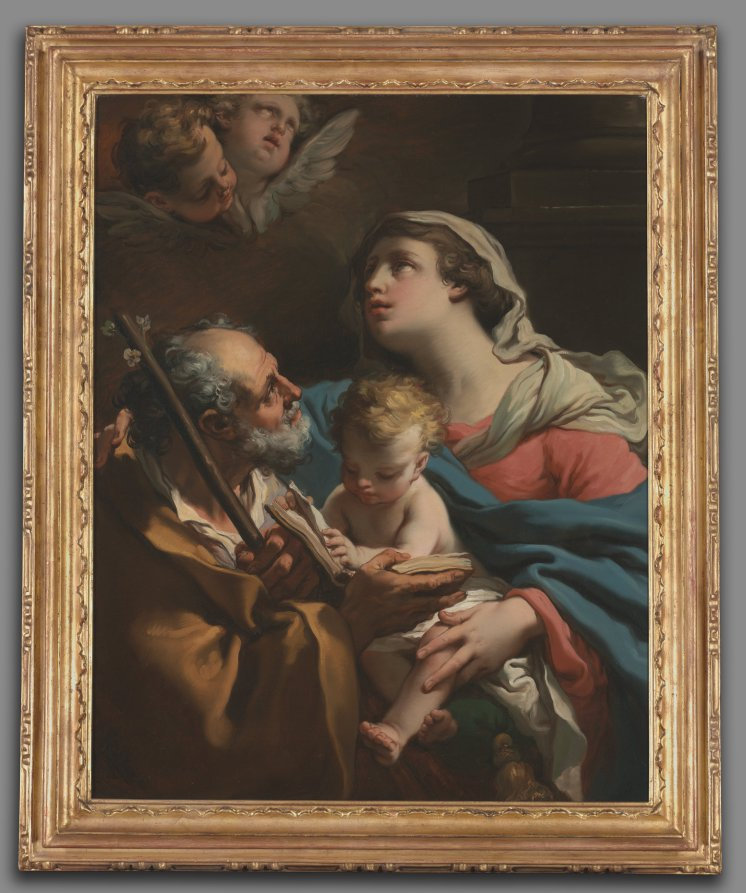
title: The Holy Family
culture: Italy, 18th century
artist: Gaetano Gandolfi (Italian, 1734–1802)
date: 1776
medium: oil on canvas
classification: Painting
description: A work of Gandolfi's later years, The Holy Family was exhibited in the religious festival at the church of San Procolo in Bologna in 1776. The painting's balanced composition, along with the suggestion of emotional connections among the figures, expresses the religious honesty of Gandolfi's art. Here St. Joseph holds the scriptures for the Christ child, who sits on his mother's lap; the elderly Joseph also holds the flowering rod, a sign from heaven that he was chosen to be Mary's husband. Joseph looks with concern toward Mary, who in turn looks up toward the cherubim hovering in a cloud at the upper left. Viewers of the private devotional painting were meant to understand that the young Christ reads of his future in the gospels, and that the suffering he will endure is reflected in Mary's sad gaze. Gandolfi was the most popular member of a prominent artistic family in Bologna. As both draftsman and painter he distinguished himself in religious, mythological, and genre subjects and was admired by his Italian and English patrons. He is known for his down-to-earth naturalism, typical of Bolognese art. The frame—although modern—is a "Gandolfini," so-called because the style was created for paintings by members of the Gandolfi family.